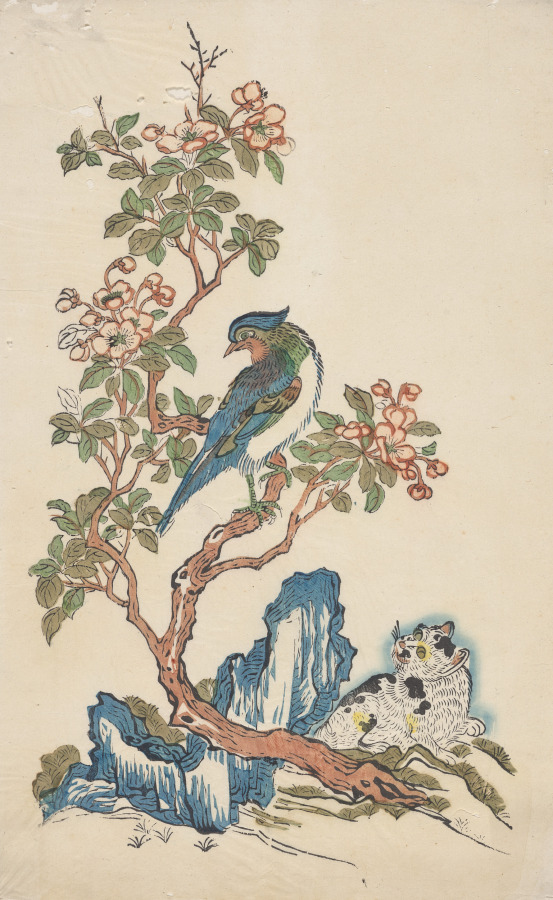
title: Picture of a Cat, a Bird, and a Crabapple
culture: China, Qing dynasty (1644–1911), Kangxi reign (1622–1722) to Yongzheng reign (1723–35)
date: 1662–1735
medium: Polychrome woodblock print; ink and color on paper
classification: Print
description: In the 1600s, printing flourished in such Jiangnan cities as Nanjing, Suzhou, Hangzhou, and Huizhou, evolving from privately enjoyed illustrated books printed in color to more commercialized single-sheet color prints that were hung on walls and became part of the rich urban visual culture.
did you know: Woodblock printing in color reached a height in China in the 1600s to 1700s. The prints were executed by means of sets of separate blocks, each carved to print a different color.